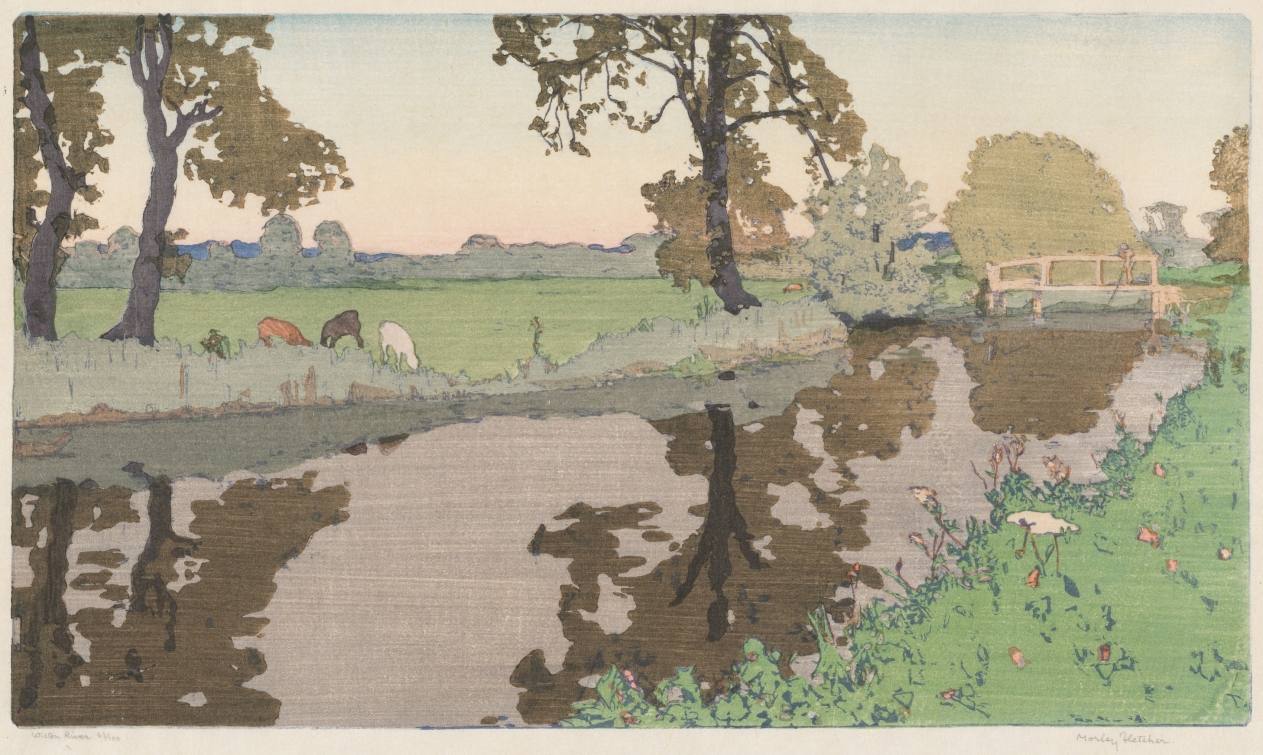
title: Wiston River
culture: England, 20th century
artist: Frank Morley Fletcher (British, 1866–1949)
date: 1911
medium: color woodcut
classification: Print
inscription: Lower margin, in pencil:" Wiston River 43/100 Morley Fletcher"